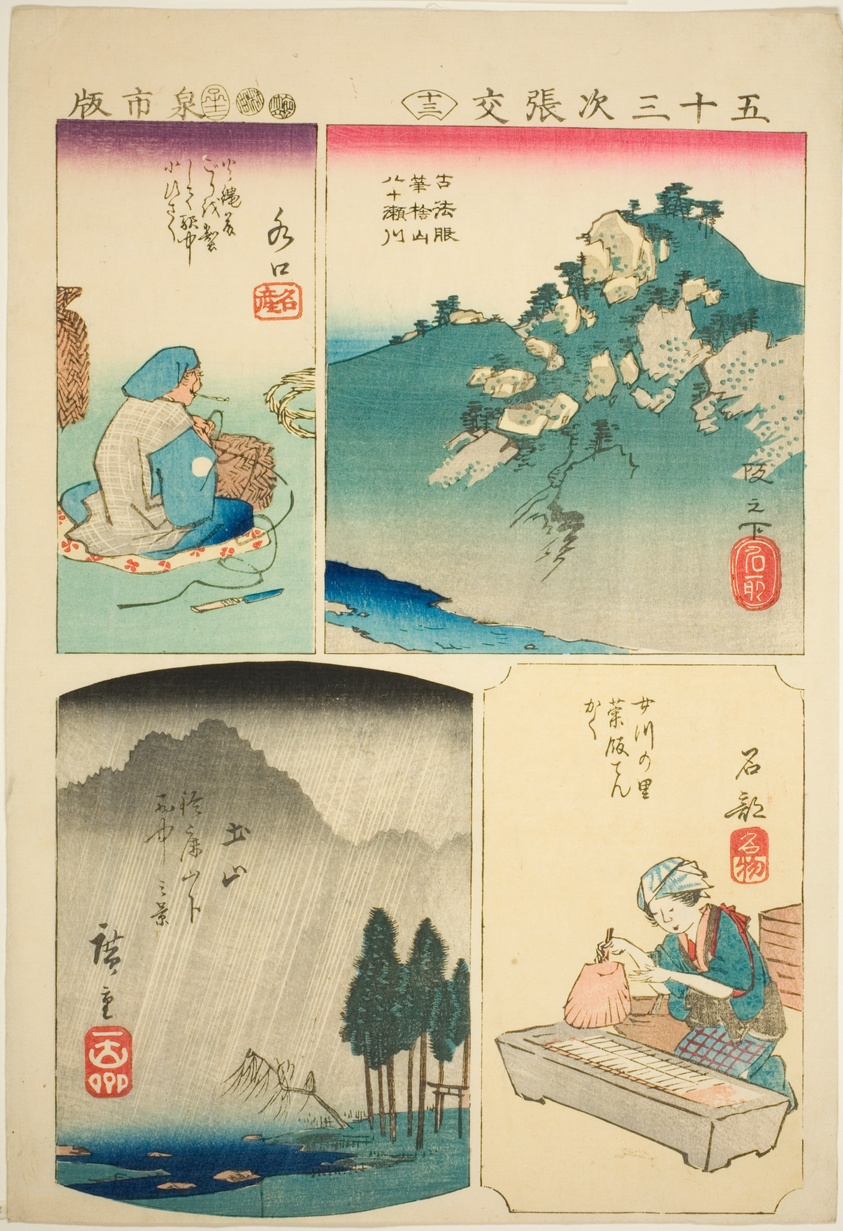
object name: Print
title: Sakanoshita, Minakuchi, Tsuchiyama, and Ishibe, no. 13 from the series "Cutouts for the Fifty-three Stations (Gojusan tsugi harimaze)"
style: Japanese (culture or style)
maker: Utagawa Hiroshige 歌川 広重; Japanese, 1797-1858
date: 1852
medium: Color woodblock print; oban, harimaze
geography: Japan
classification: woodblock print; print; asian art